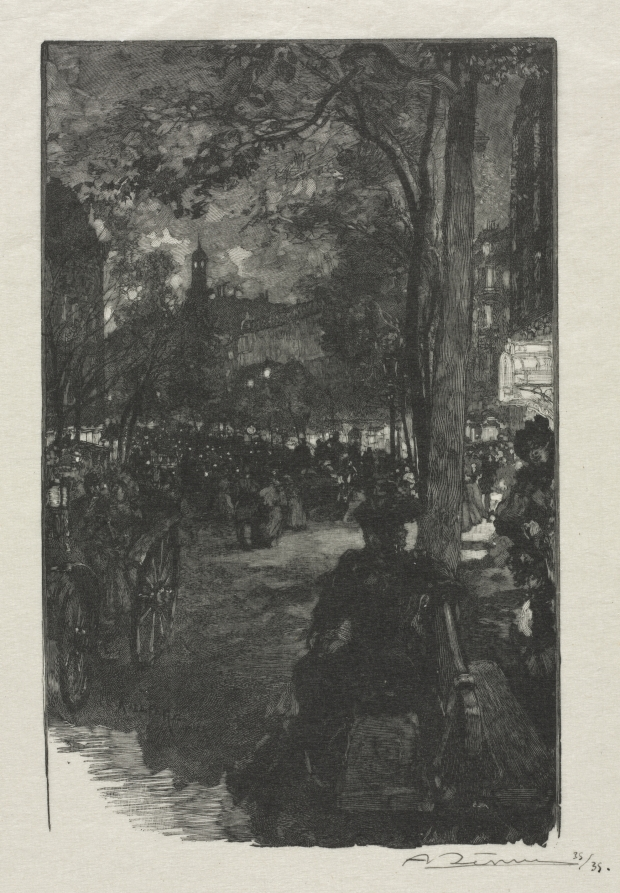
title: Boulevard Montmartre, Evening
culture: France, 19th century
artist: Auguste Louis Lepère (French, 1849–1918)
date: 1890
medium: wood engraving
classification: Print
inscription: signed and numbered in black ink, lower right margin: "A. Lepere 35/35"